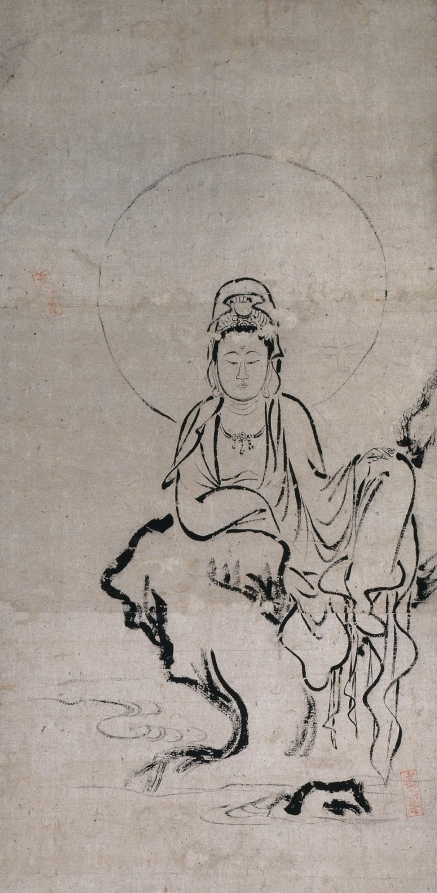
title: White-Robed Kannon (Byakue Kannon)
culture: Japan, Kamakura period (1185–1333)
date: c. 1200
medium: hanging scroll; ink on paper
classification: Painting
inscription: 箱書 石座観音 高山寺舊蔵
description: Kannon is a deity of mercy and compassion in the Buddhist faith. This monochrome sketch comes from Kōzan-ji, a temple in northwest Kyoto. The subdued ink tones and plain brushwork reflect the taste of Zen Buddhism, which began to have an impact on the visual arts in 13th-century Japan.